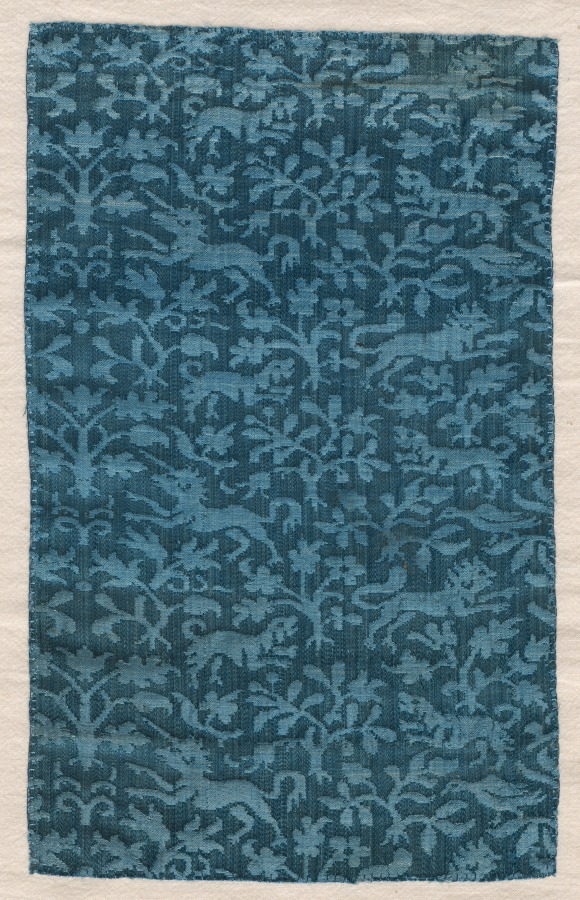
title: Textile Fragment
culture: Italy, 16th-17th century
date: 1500s - 1600s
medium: damask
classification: Textile